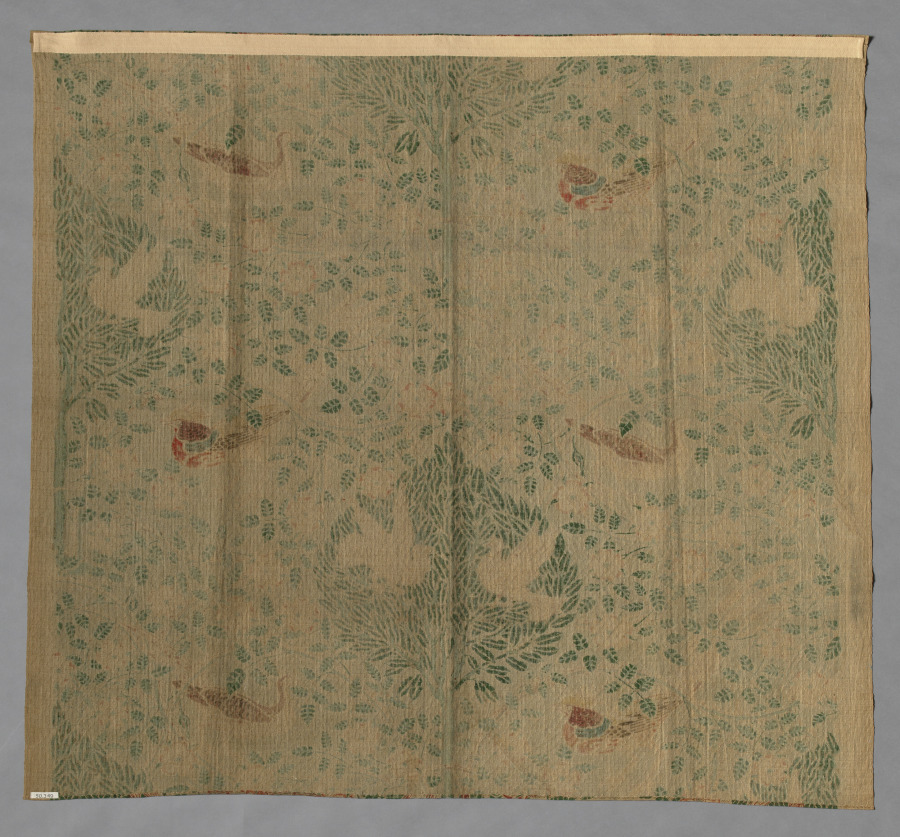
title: Cloth with Rooster and Hen Design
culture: Unassigned, 19th century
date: c. 1890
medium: roller printed cotton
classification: Textile